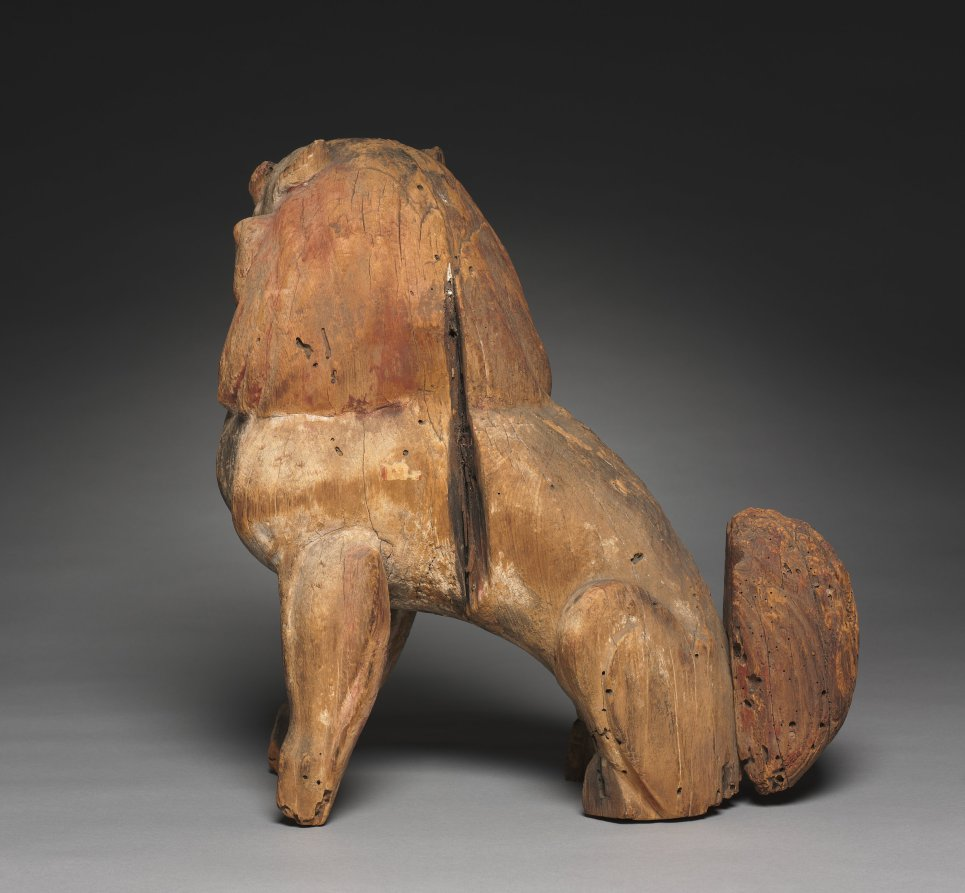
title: Guardian Animal: Komainu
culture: Japan, Kamakura period (1185–1333)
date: 1300s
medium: Wood with traces of color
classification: Sculpture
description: Placed at the entrance to shrines and temples in Japan, guardian figures ward off evil spirits. These guardians used to be painted red and white and are distinguishable by their facial expressions: the open-mouthed animal is a karashishi, or “Chinese lion,” while the close-mouthed beast, which once had a single horn protruding from its head, is called a komainu, or “Korean dog.” The mouths correspond to infinity, the syllables ah (open) and um (closed), or the alpha and omega. This pairing was widespread in ancient times in Chinese territories and likely found its way to Japan via kingdoms in Korea.